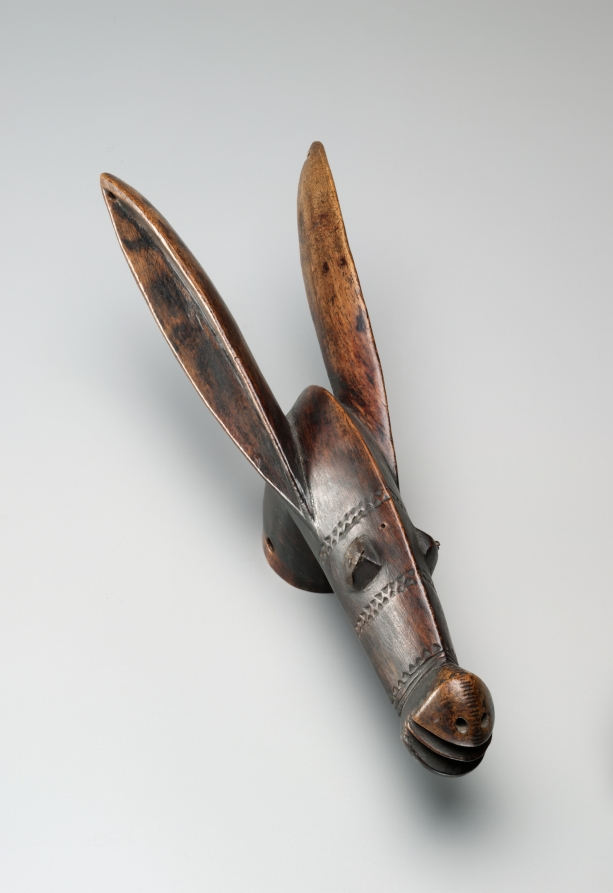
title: Head of a Hobbyhorse (korèdugaso)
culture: Africa, West Africa, Mali, Bamana blacksmith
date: late 1800s–early 1900s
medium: Wood and iron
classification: Sculpture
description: Pertaining to the male initiation society called Korè, this sculpture from the Koulikoro region represents the head of an aardvark and is part of a wooden hobbyhorse that is mounted by a ritual buffoon. The Korè initiates are divided into different classes, each having a designated mask. The ritual buffoons appear in pantomimes on different public occasions and poke fun at village authorities and other high-ranking individuals.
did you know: This is one of the best-known examples of a korèdugaso. It was featured on the catalogue cover for a 1935 exhibition at the Museum of Modern Art, one of the first on African arts in the US. It traveled to the CMA that same year.